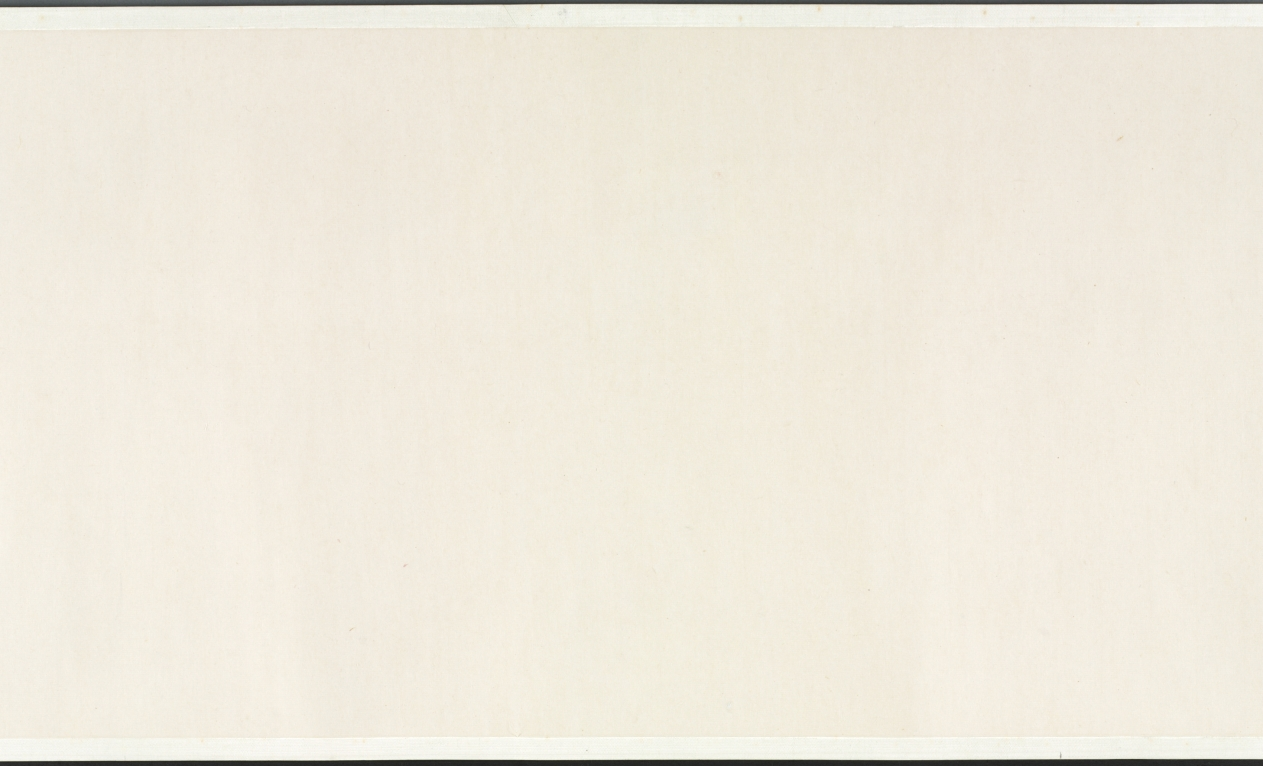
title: Buddha's Conversion of Five Bhiksu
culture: China, Yuan dynasty (1271–1368)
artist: Li Sheng (Chinese, active c. 1324–after 1375)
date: mid-1300s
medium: handscroll; ink on paper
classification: Painting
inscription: 紫篔生李升識 [印] 李氏子雲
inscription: 4 colophons and 12 additional seals: The "Heart" Sutra (Maha Prajnaparamita) text written by Wu Yuqing 吳餘慶 (active early 1400s); 2 seals of Xu Qianxue 徐乾學 (1631–1694); 3 colophons, one dated 1929 and two dated 1936, and 9 seals of Wu Hufan 吳湖帆 (1894–1968); 1 colophon, dated 1932, of Chen Dingshan; 1 seal unidentified.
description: This episode stems from the life of the historical Buddha, who, after his enlightenment, was initially hesitant about preaching his own doctrine. After much personal deliberation and prodding by deities, he finally relented. The first converts were the five guards who served him when he was still a prince. For Li Sheng, this is the pretext of the painting, which moves from the interaction of the bhiksu with the Buddha to a broader awareness of the vast surroundings of the scene.